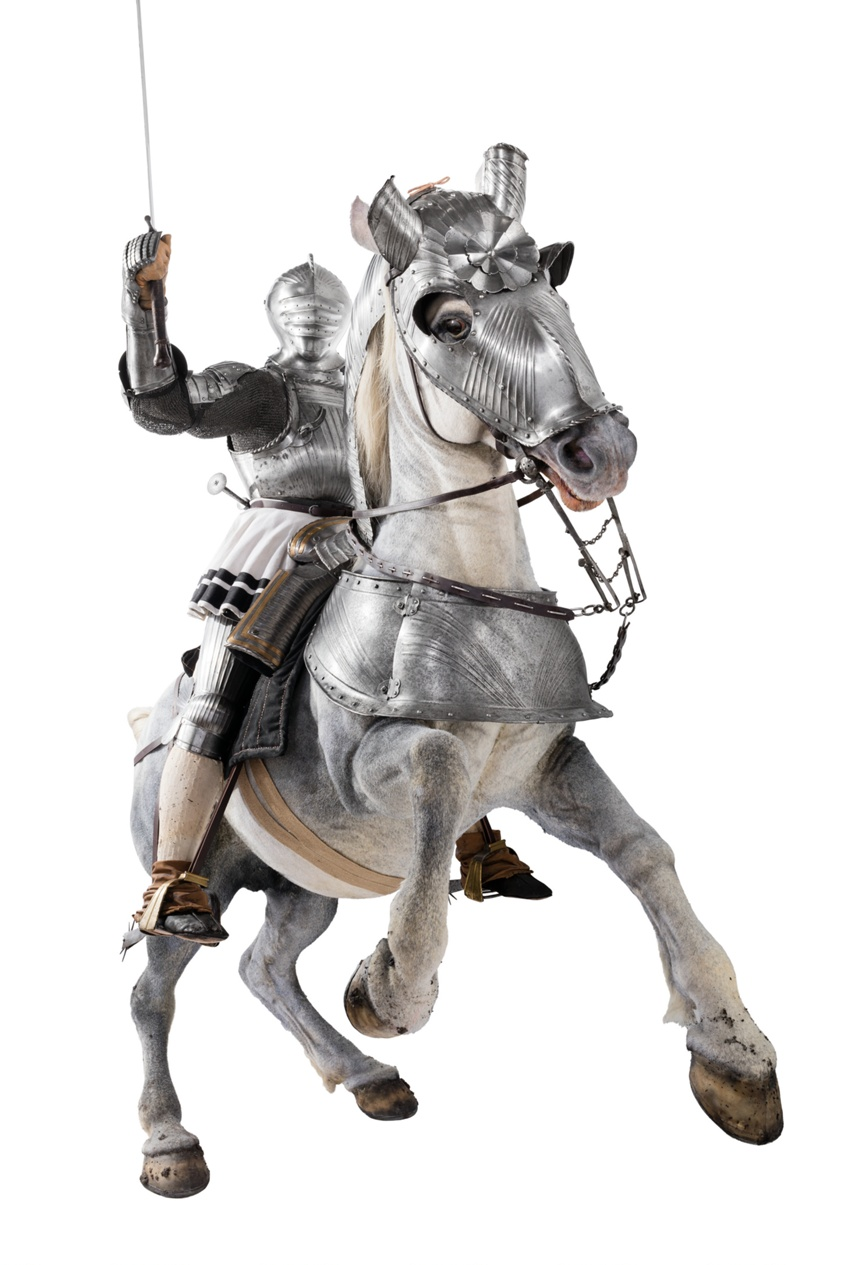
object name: Armor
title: Field Armor for Man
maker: South German, Nuremberg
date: c. 1520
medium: Steel, iron, brass, leather, and textile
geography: Nuremberg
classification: suit; armor; arms and armor